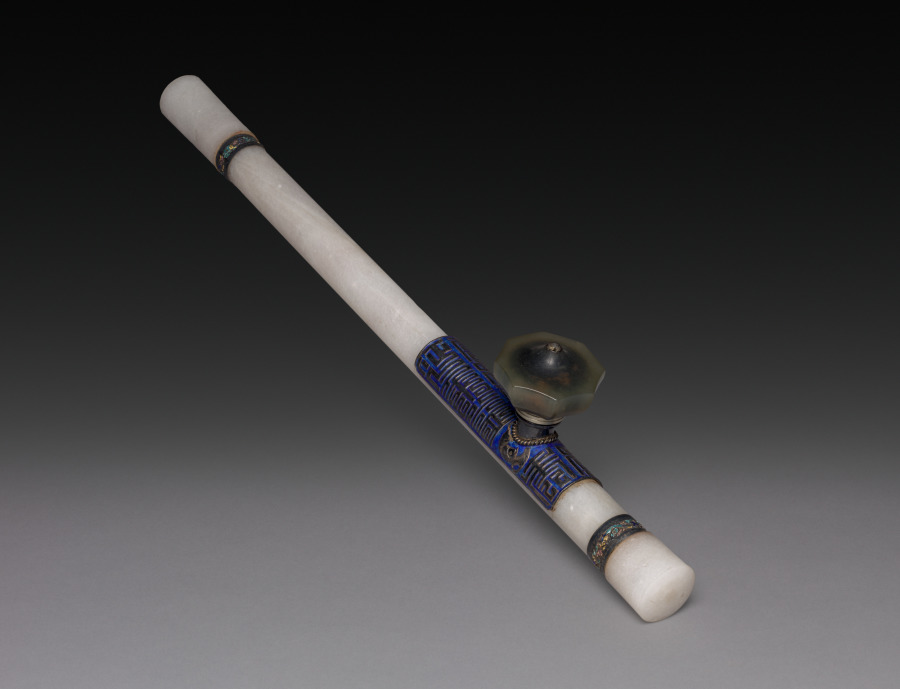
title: Opium Pipe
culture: China, Qing dynasty (1644-1911)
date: 1800s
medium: jade stem decorated with silver ferrules embellished with enamel; jade bowl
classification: Miscellaneous